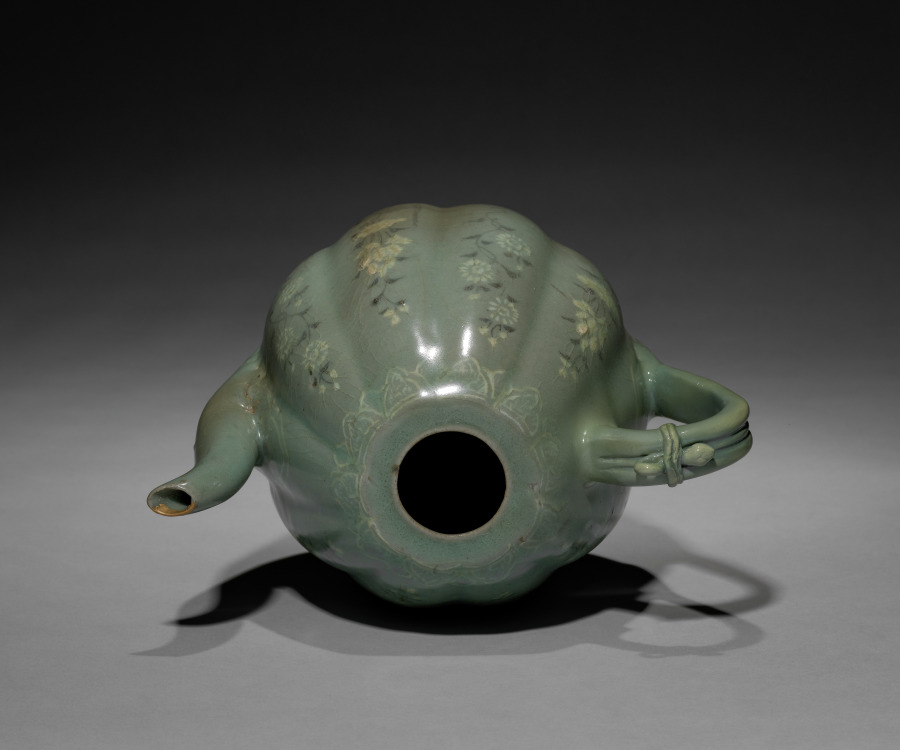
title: Melon-shaped Ewer with Incised Peony Design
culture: Korea, Goryeo dynasty (918–1392)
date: 918–1392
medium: pottery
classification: Ceramic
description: This melon-shaped pitcher is adorned with a delicate drawing that renders chrysanthemum buds with full blossoms in white and black inlays. In Korea, chrysanthemum flowers and leaves were made into both tea and wine. Chrysanthemum wine was enjoyed during the the Double Nine Festival (the ninth day of the ninth month in the lunar calendar) when praying for longevity.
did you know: The shape of this pitcher resembles a type of yellow muskmelon cultivated mainly in East Asia.